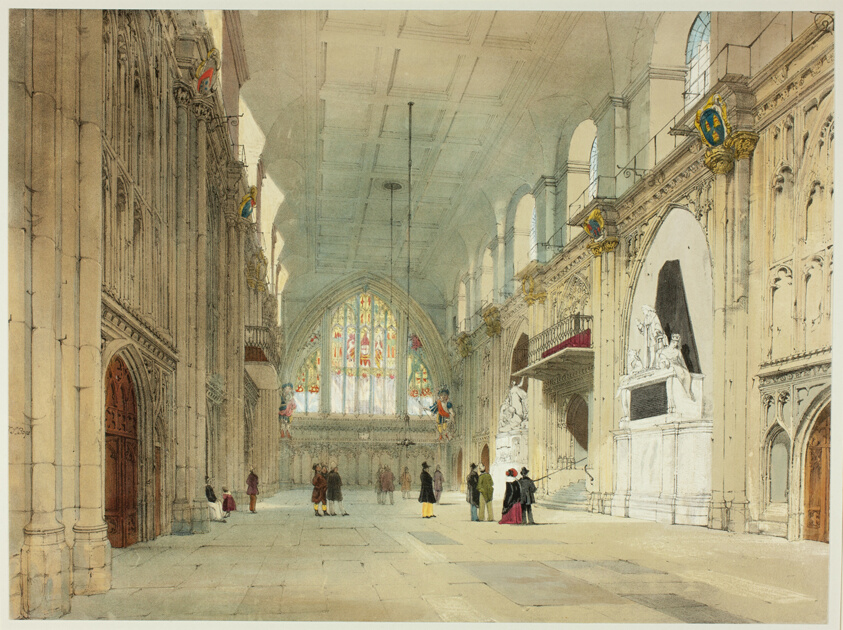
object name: Print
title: The Guildhall, plate 25 from Original Views of London as It Is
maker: Thomas Shotter Boys (English, 1803-1874); designed by Charles Ollier (English, 1788-1859)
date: 1842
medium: Hand-colored lithograph on paper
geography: England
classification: lithograph; print; prints and drawing